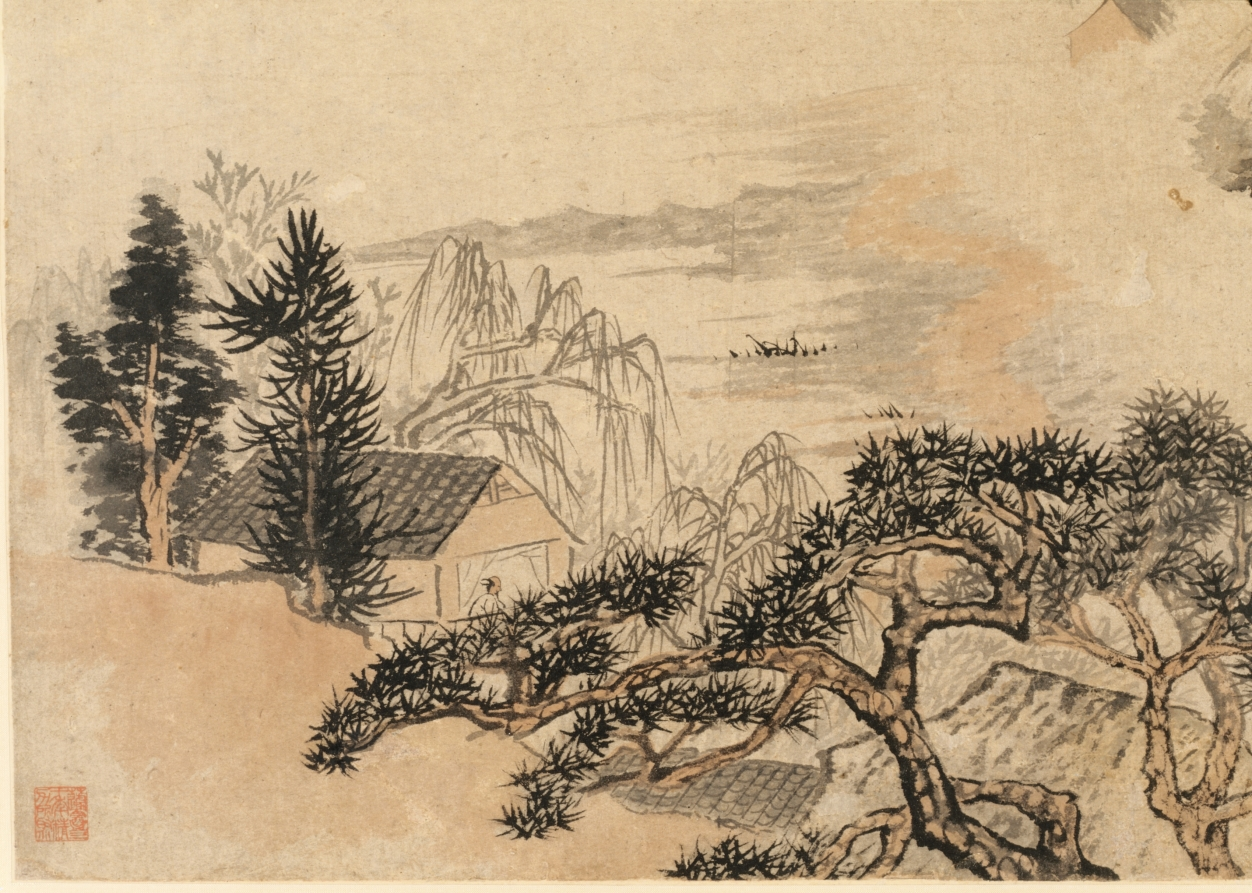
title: Spring Mist over Jiangnan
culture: China, Qing dynasty (1644-1911)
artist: Shitao (Chinese, 1642–1707)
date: 1697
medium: Hanging scroll; ink and light color on paper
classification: Painting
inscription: 揚子橋邊江水泛，柳絲弄色不管人白頭。/ 一春雨雪阻遊屐，梅花尚可清明留。/ 老去無聊藉朋輩，年來星散隨波鷗。/ 汪子無端向我發長嘯，吾將縱覧閩澥之奧妙。/ 請君置我先向畫圖看，眼前丘壑都一掃。/ 千里萬里毫端見，非墨非煙聊寄傲。/ 君家嚴親百代才，一言奏對驚風雷。/ 天子非常賜顏色，灜台稱旨今南來。/ 多少寒灰待君活，看君作意為龍媒。 丁丑春題畫，贈汪子牧庭之閩海。兼呈思白學使。清湘老人濟大滌堂下。[印]原濟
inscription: 2 colophons and 7 additional seals: 1 colophon and 4 seals of He Yuanyu 何瑗玉 (1840-?); 1 colophon and 2 seals of Li Xinhui (19th-20th c.); 1 seal unidentified.